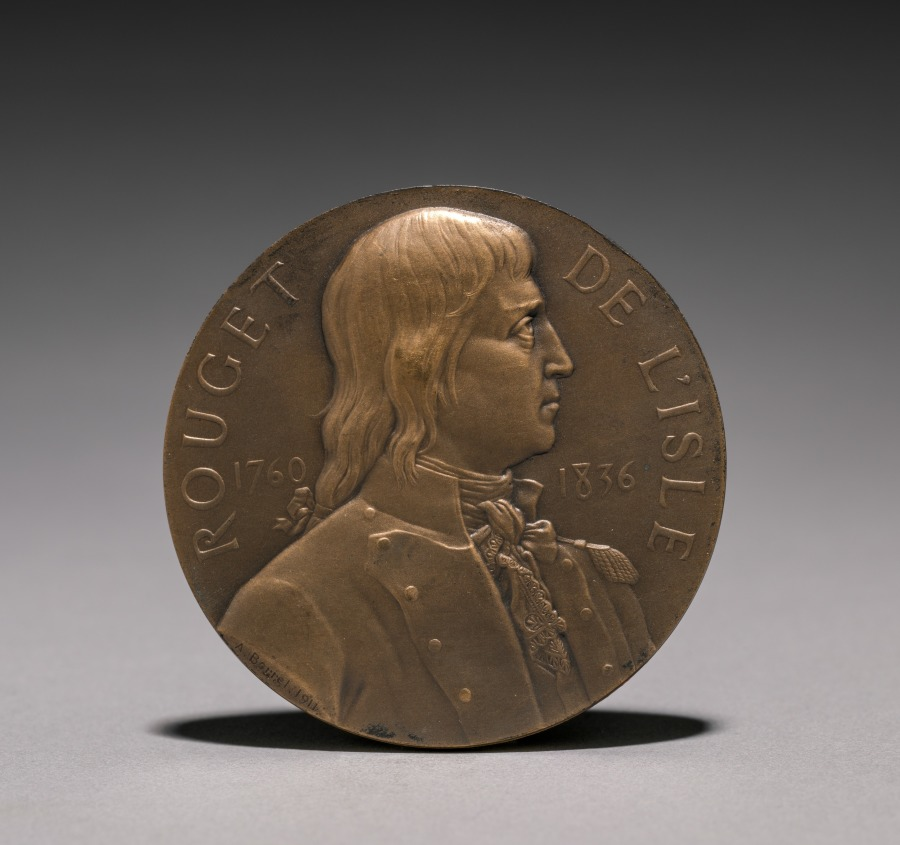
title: Medal of Claude Joseph Rouget de L'Isle (1760-1836)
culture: France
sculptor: Alfred Borrel (French, 1836–1927)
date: 1911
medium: bronze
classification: Metalwork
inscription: Obverse: raised inscription: ROUGET DE L'ISLE 1760 1836; inscribed lower left: A. BORREL Reverse: [score and all verses of "La Marseillaises"]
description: The French sculptor and medalist Alfred Borrel (1836-1927) created this portrait medal to commemorate the 75th anniversary of Rouget de L'Isle's death in 1836, the same year in which the sculptor was born.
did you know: Claude Joseph Rouget de L'Isle composed the French national anthem, La Marseillaises, in 1792 in Strasbourg after France had declared war on Austria.